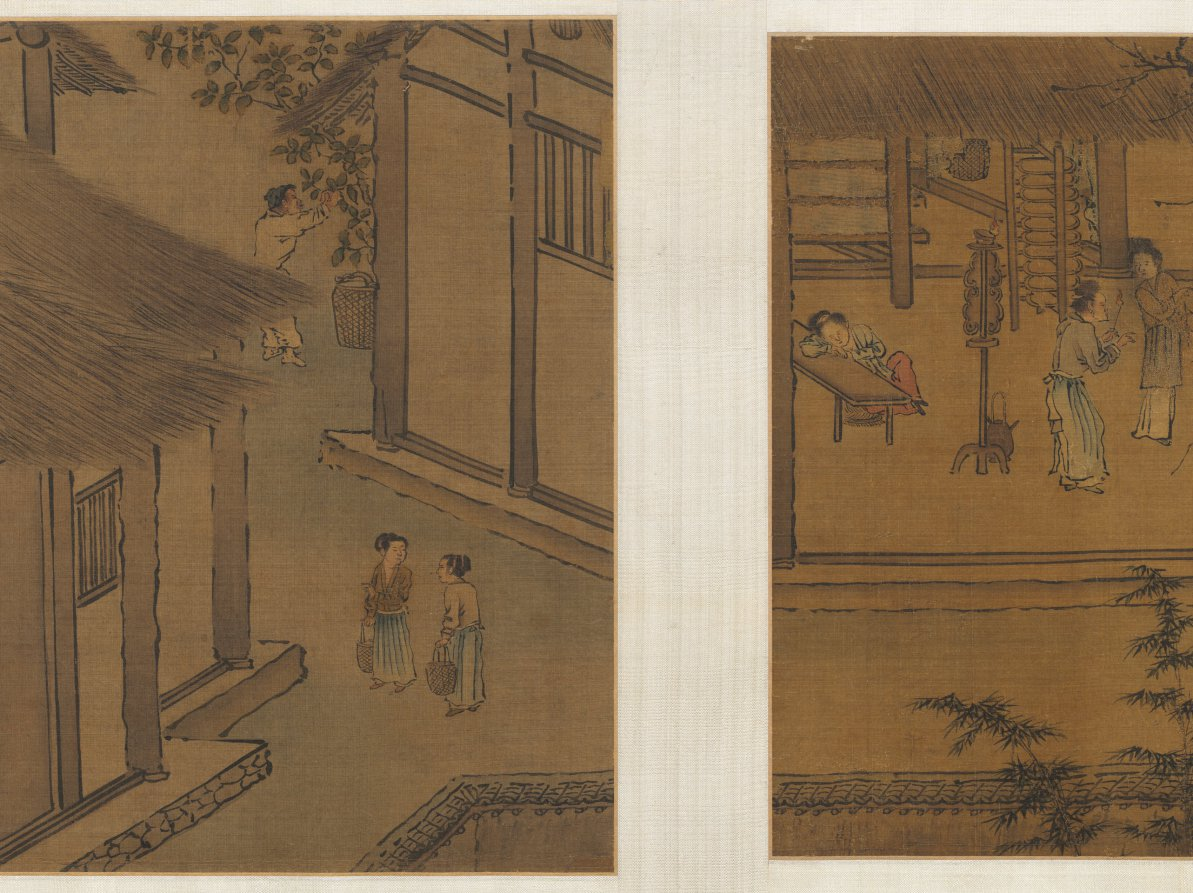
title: Sericulture (The Process of Making Silk)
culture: China, Southern Song dynasty (1127-1279)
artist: attributed to Liang Kai (Chinese, mid-1100s–early 1200s)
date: early 1200s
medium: Handscroll; ink and color on silk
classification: Painting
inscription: 3 colophons and 7 seals of Ch'eng Ch'i (20th c.).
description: By the Southern Song period, the economic center of the silk industry had shifted to the lower Yangzi delta, while the north continued to be troubled by wars. Divided into three sections, the handscroll illustrates 14 steps in the process of making silk, from the raising of silkworms to the weaving of silk cloth. The scroll’s scenes follow the illustrations of Lou Shou’s (1090–1162) Pictures of Tilling and Weaving (gengzhi tu), the first recorded painting of this genre, which was conceived in Hangzhou around 1145. However, in the Cleveland painting the artist groups several scenes of sericulture together under the roof of an open structure.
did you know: The painting is attributed to Liang Kai, a court artist active from about 1201 to 1204 at the Imperial Painting Academy in the city of Hangzhou, a major silk weaving center from that time to the present day.